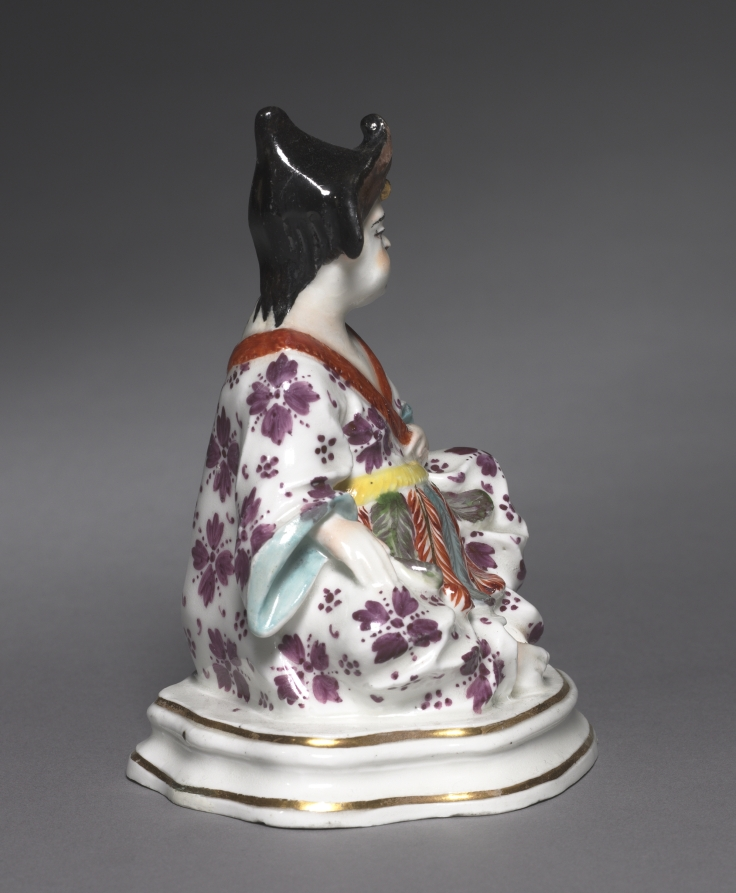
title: Seated Chinese Figure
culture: Germany, Meissen, 18th century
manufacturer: Meissen Porcelain Factory (German, est. c. 1710)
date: c. 1730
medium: porcelain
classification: Ceramic